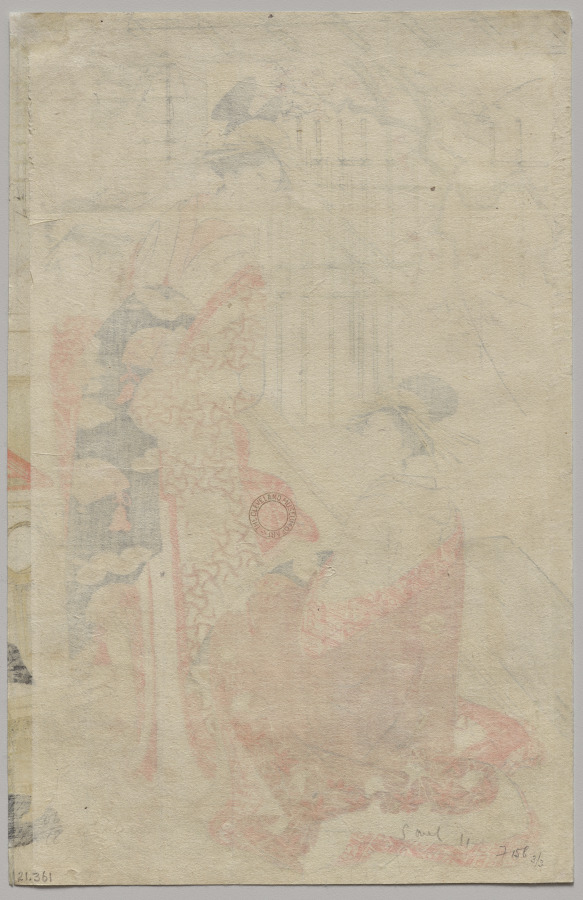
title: Courtesans of the Ōgiya on a Spring Outing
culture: Japan, Edo period (1615–1868)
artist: Utagawa Toyokuni (Japanese, 1769–1825)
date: mid- or late 1790s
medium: One of a triptych of woodblock prints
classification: Print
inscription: Signature: Toyokuni ga Publisher: Izumiya Ichibei (Senichi han) Censorship Seal: kiwame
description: In these prints, two courtesans of the Ōgiya brothel are entering an open pavilion, while another group gathers around a Japanese hibachi inside. Hanaōgi, the most celebrated courtesan of Ōgiya in the late 1700s, is depicted at a desk. Holding a brush in her hand, she turns her head to one side as if gathering her thoughts before writing in the book before her. Both her position and her loosened hair separate Hanaōgi from her courtesan companions who wear elaborate coiffures. This depiction of her captures both her knowledge of poetry and her skill as a calligrapher.